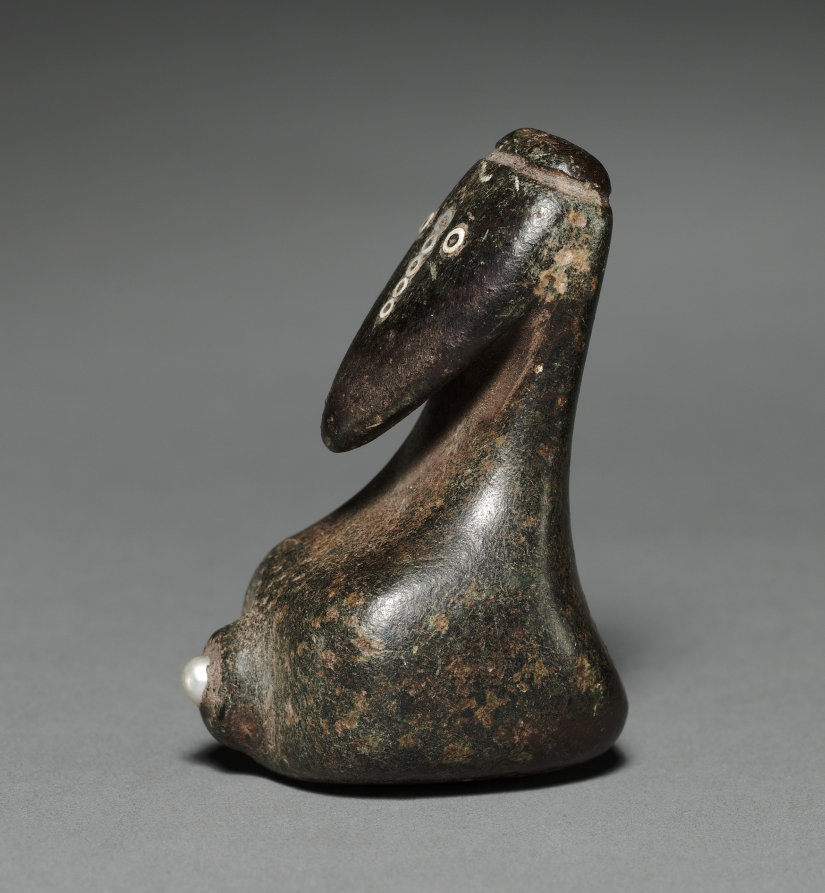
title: Pelican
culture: America, North American Indian, Channel Islands, Island of San Nicolas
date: 1800s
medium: stone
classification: Sculpture